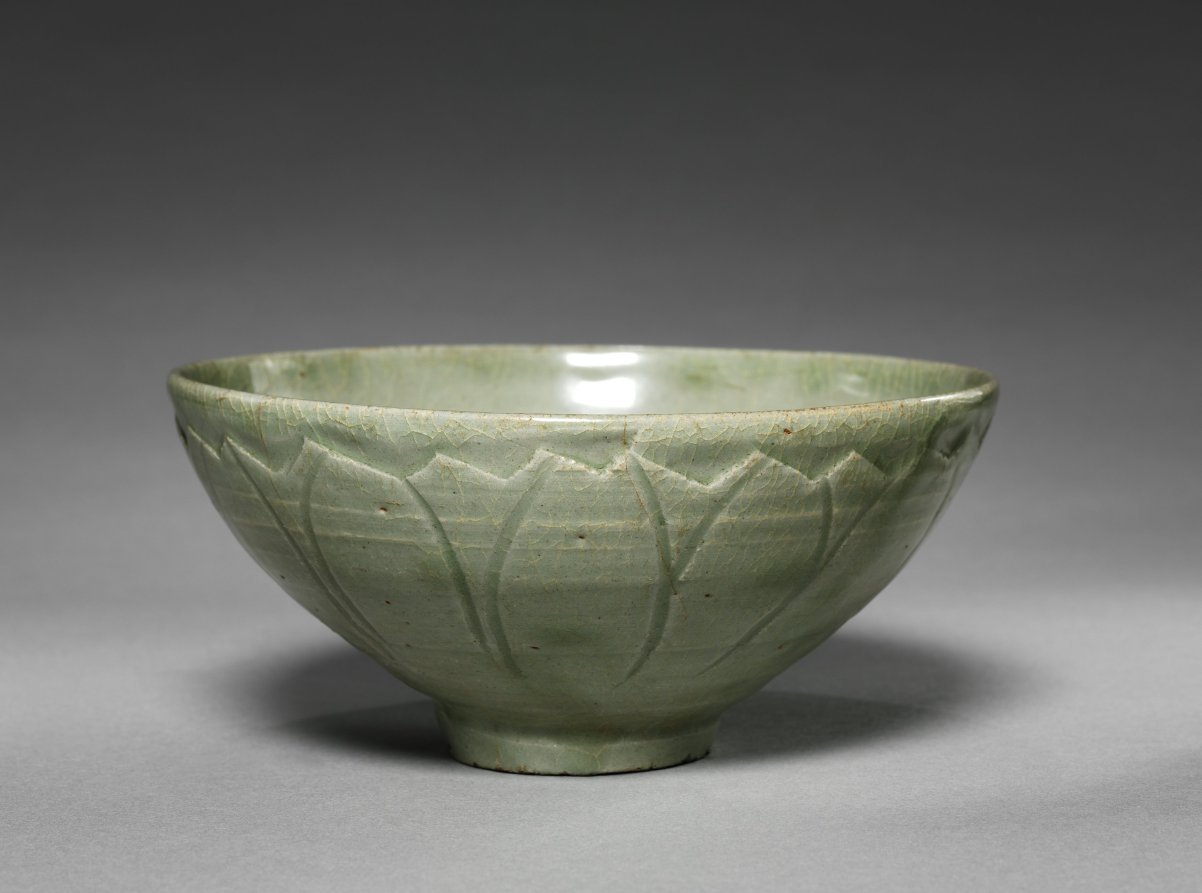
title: Bowl with Lotus Petal Design in Relief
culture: Korea, Goryeo dynasty (918–1392)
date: 1200s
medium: porcelain celadon ware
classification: Ceramic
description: As early as the 600s, the practice of drinking tea and wine became an important part of elite leisure culture in Korea. A wide bowl like this example was especially suitable for drinking powdered tea shaved from a compressed tea cake, the most commonly enjoyed type during the Goryeo period. The outer wall of this tea bowl is decorated with the image of lotus flower, a symbol of purity.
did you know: The exterior decor that resembles an opening lotus flower was shaped in a carved wooden mold. Then the potter touched it up with incised details.